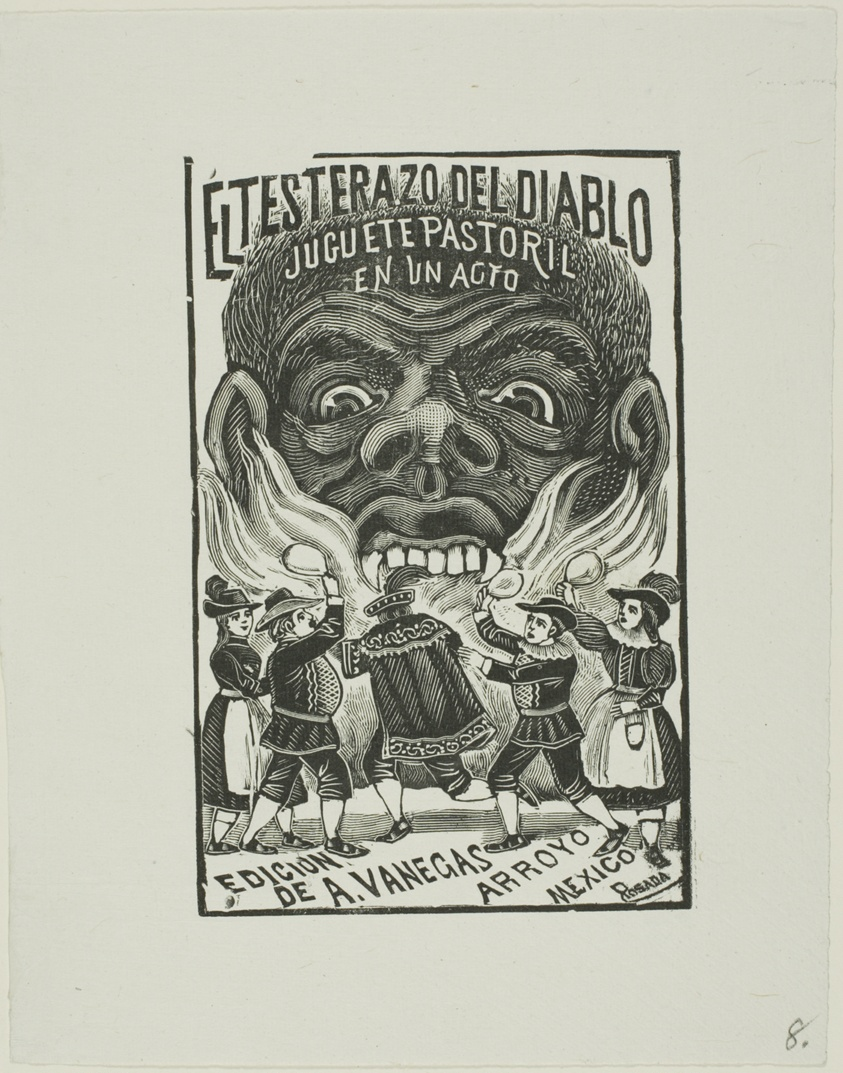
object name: Print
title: The Devil Butts With His Head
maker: José Guadalupe Posada (Mexican, 1852-1913)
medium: Relief engraving on typemetal on paper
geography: Mexico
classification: relief etching; print; prints and drawing